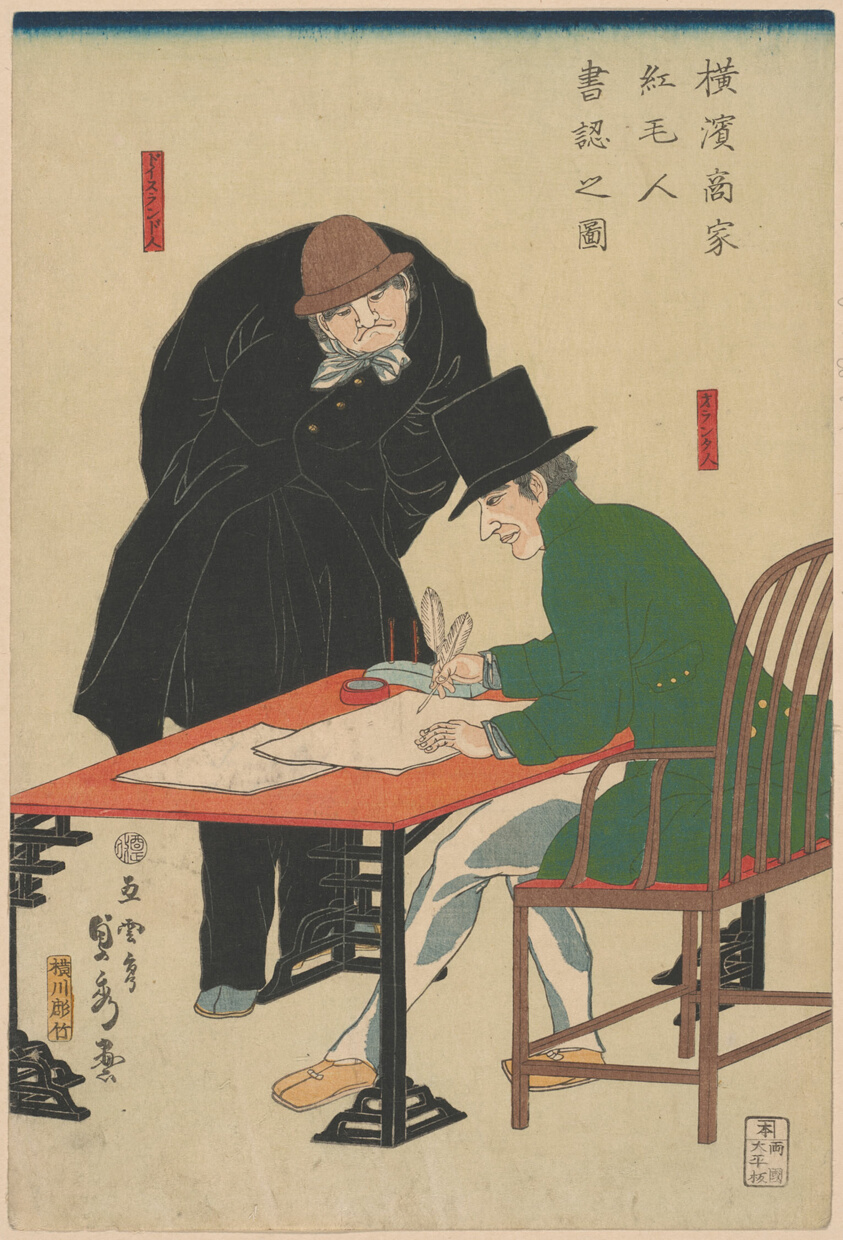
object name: Print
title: Foreigner Checking Documents at a Merchant House in Yokohama (Yokohama shoka komojin sho mitomu no zu)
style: Japanese (culture or style)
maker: Utagawa Sadahide (Japanese, 1807-1873)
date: 1861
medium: Color woodblock print; oban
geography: Japan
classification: woodblock print; print; asian art